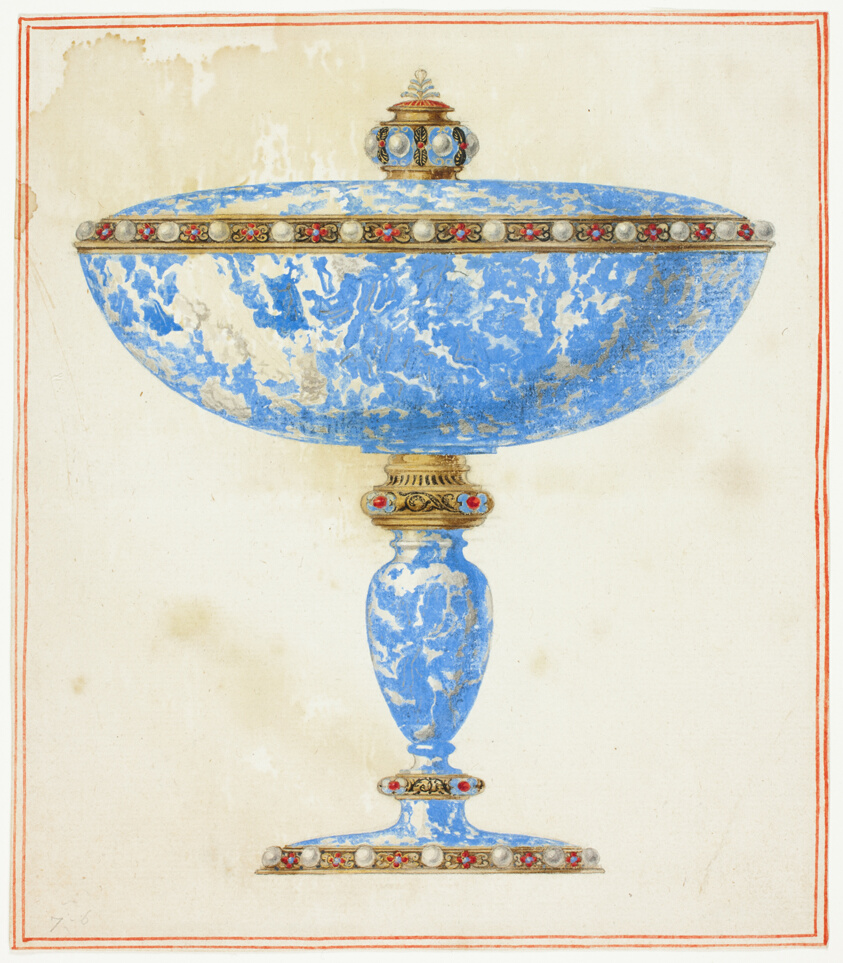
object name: Drawing and Watercolor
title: Lapis Covered Dish on Stand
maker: Giuseppe Grisoni (Italian, born Flanders, 1699-1769)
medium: Gouache, heightened with touches of gold paint, over black chalk, on ivory laid paper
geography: Flanders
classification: gouache; watercolor; drawings (visual works); prints and drawing